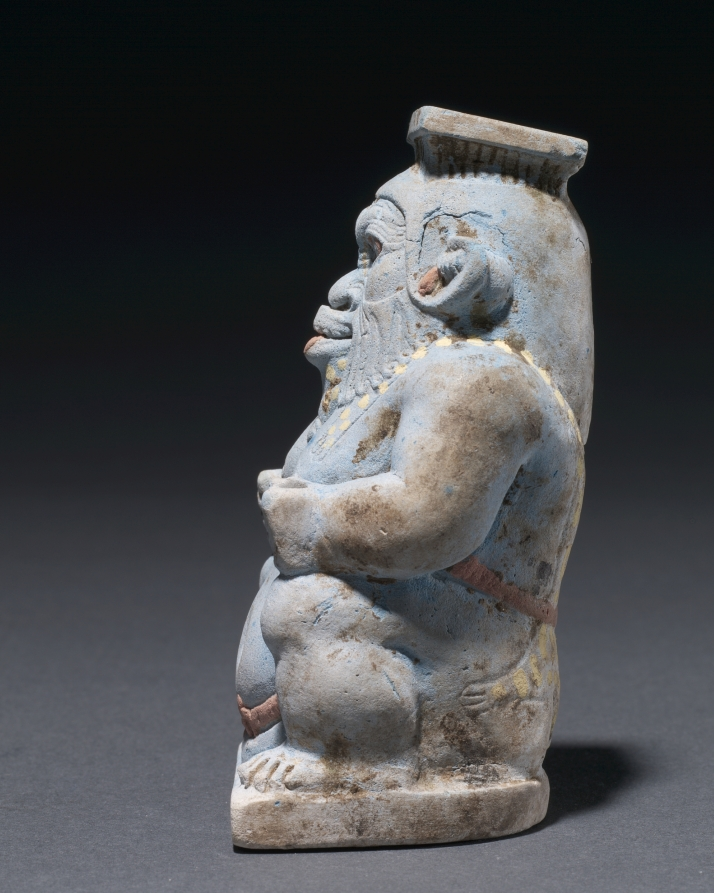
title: Cosmetic Jar in the Form of the God Bes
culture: Egypt, Late period (715–332 BCE), Dynasty 26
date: 664–525 BCE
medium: Egyptian blue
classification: Vessels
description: Both ancient Egyptian men and women loved cosmetics. Unguents, oils, and perfumes made from aromatic plant resins and gums were obtained at great cost from distant lands. The objects identified with cosmetics were given lavish treatment. The god Bes, patron god of cosmetics, is the subject of this colorful jar.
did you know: Bes was the Egyptian god of many things, including cosmetics, war, and childbirth.